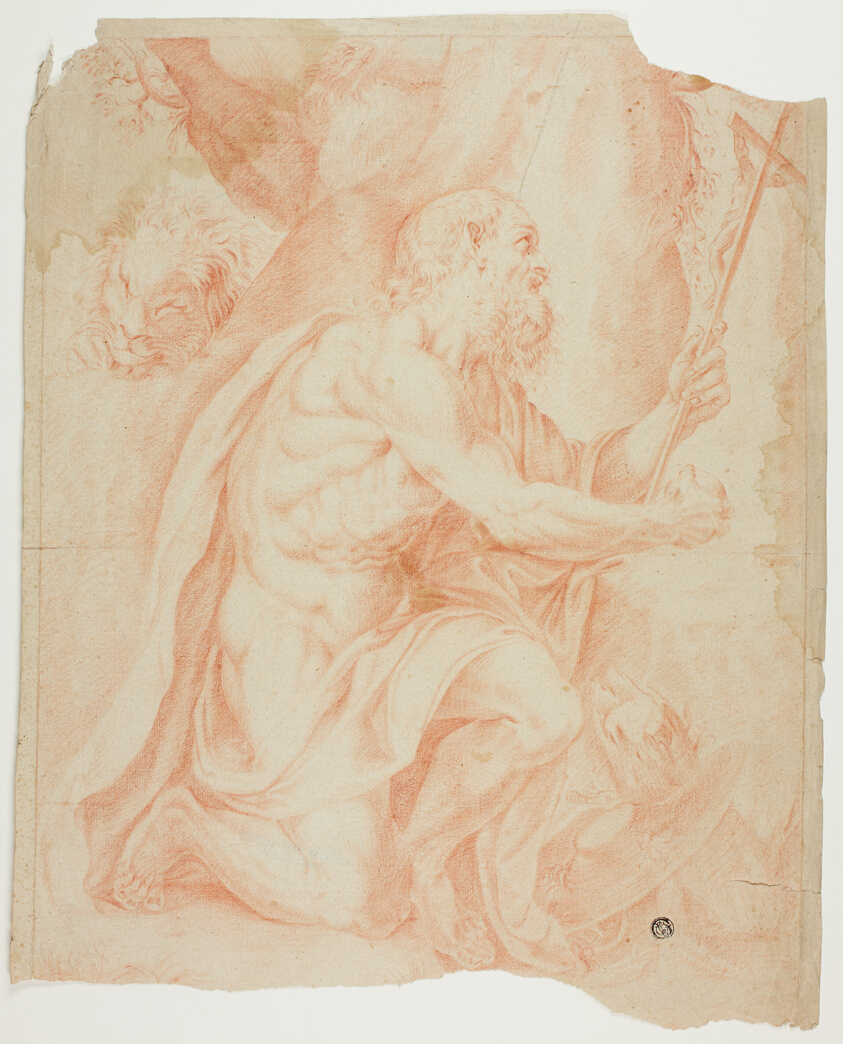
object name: Drawing and Watercolor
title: Saint Jerome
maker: After Agostino Carracci; Italian, 1557-1602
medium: Red chalk on ivory laid paper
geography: Italy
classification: chalk; drawings (visual works); prints and drawing